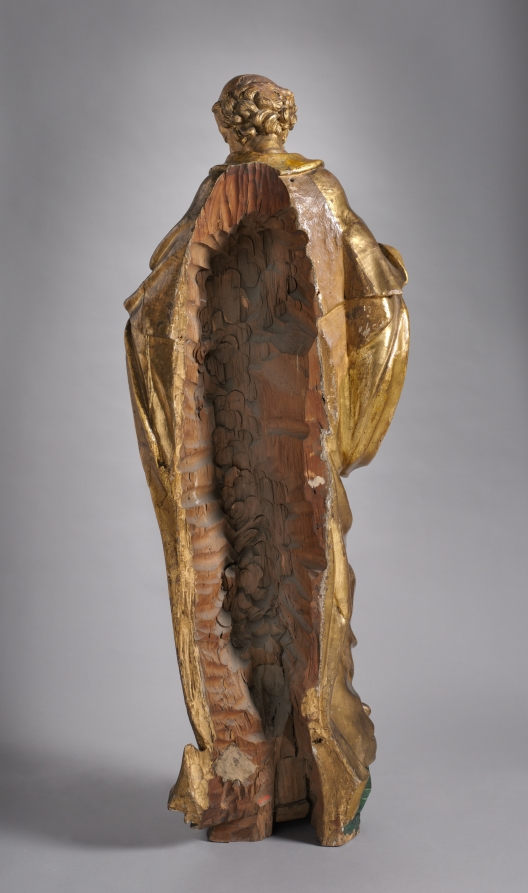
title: Saint Joachim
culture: Germany, 18th century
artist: Joseph Anton Feuchtmayer (German, 1696–1770)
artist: or Circle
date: c. 1760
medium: gilded wood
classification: Sculpture